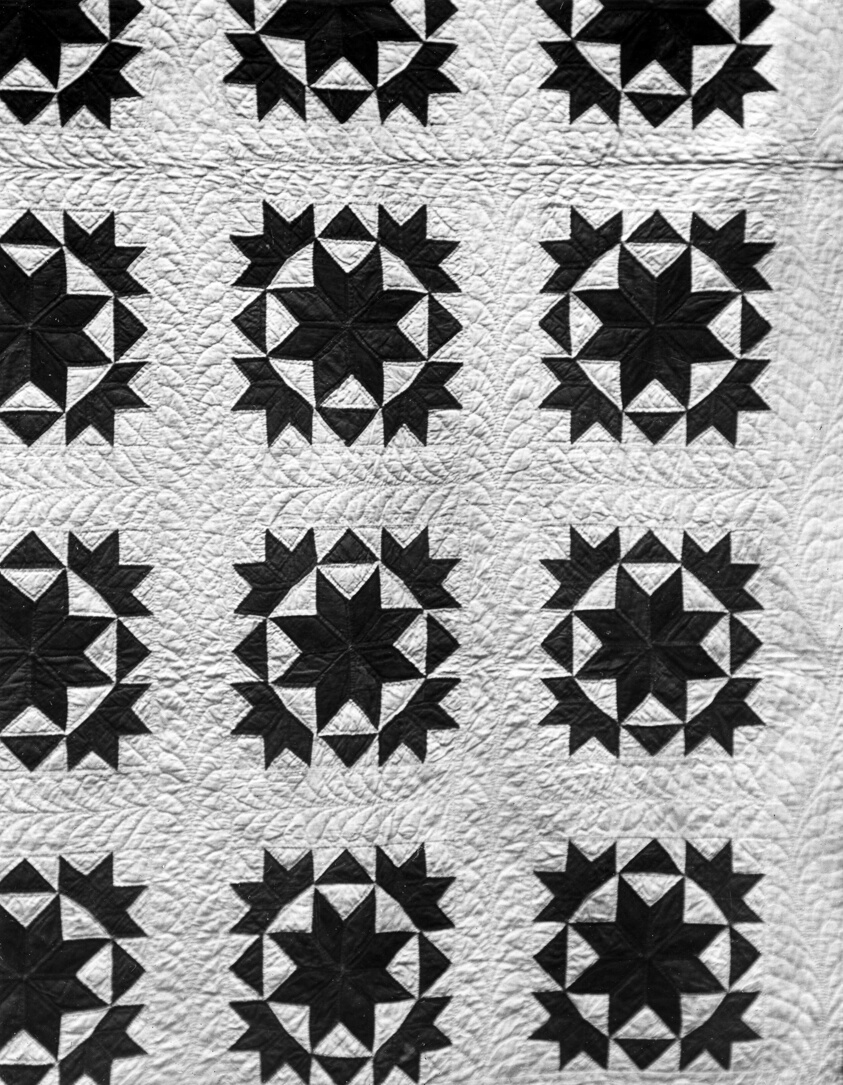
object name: Textile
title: Bedcover (Sunburst or Modern Star Quilt)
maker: United States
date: c. 1850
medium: quilted, pieced, lining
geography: United States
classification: textile; needlework - quilt